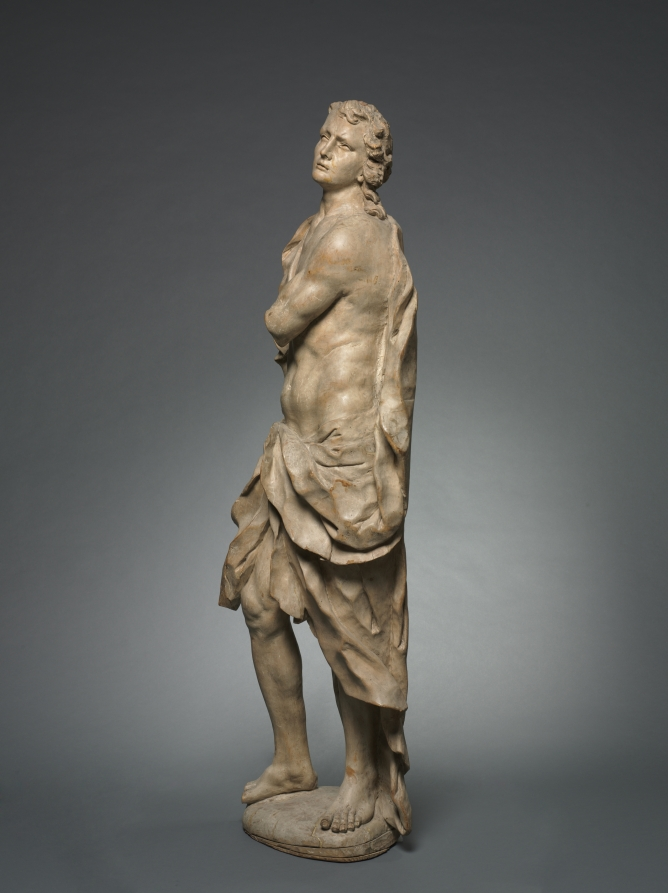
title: A Saint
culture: Germany or Austria, 18th century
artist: follower of Diego Francesco Carlone (Italian, 1674–1750)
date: c. 1730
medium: wood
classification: Sculpture